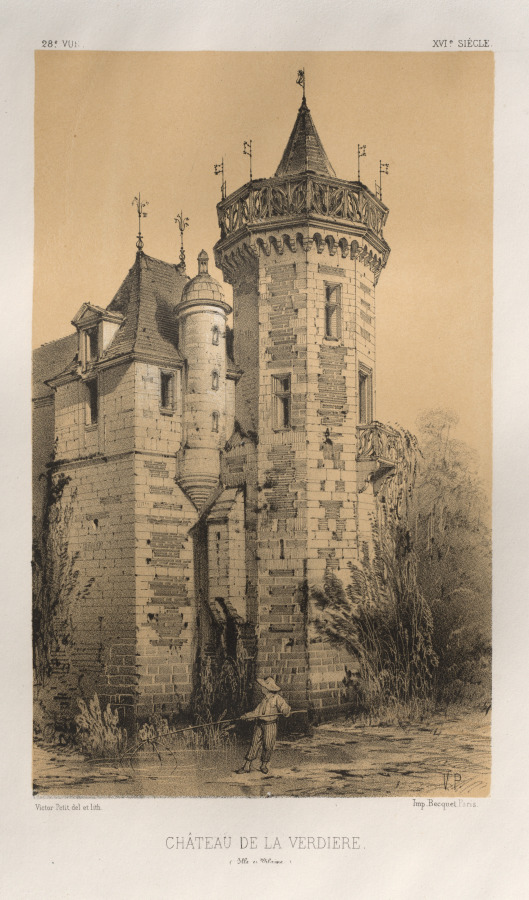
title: Architecture Pittoresque ou Monuments des xveme. Et xvieme. Siecles: Chateaux De France des XV et XVI Siecles: Pl. 28, Chateau De La Verdiere (Ille en Vilaine)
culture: France, 19th century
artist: Victor Petit (French, 1817–1874)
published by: Charles Boivin (publisher and editor); Lith de Godard a Paris (printer)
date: published 1860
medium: lithograph with tint stone, from portfolio of 100 lithographs with tint stone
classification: Print